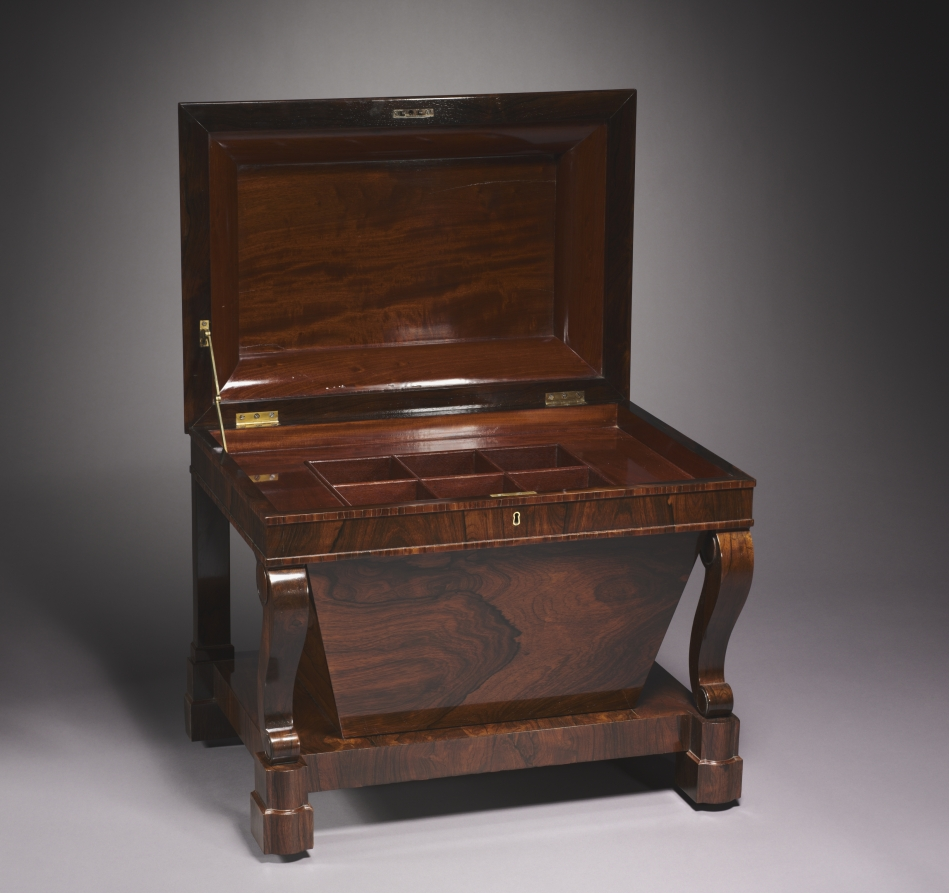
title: Cellarette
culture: America, New York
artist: firm of Duncan Phyfe and Son (American, 1768–1854)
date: c. 1840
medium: chiefly rosewood veneer with pine and poplar secondary woods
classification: Furniture and woodwork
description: Easily the most famous American furniture maker, Duncan Phyfe (born Scotland, 1768-1854) gave his name to New York furniture that is similar to English Sheraton pieces of the early 19th century-characterized by simple designs, straight lines, thin legs, and classical ornamentation. Despite the fashionable success enjoyed by his work, Phyfe responded to stylistic changes, and by the 1830s had evolved a more severe mode that has been termed the "Grecian plain style." This sideboard and its cellarette (a cabinet for storing wine or liquor) are superb examples of that taste, relying for their effect on relatively simple structural forms with ornamentation largely limited to the use of boldly patterned rosewood veneers.